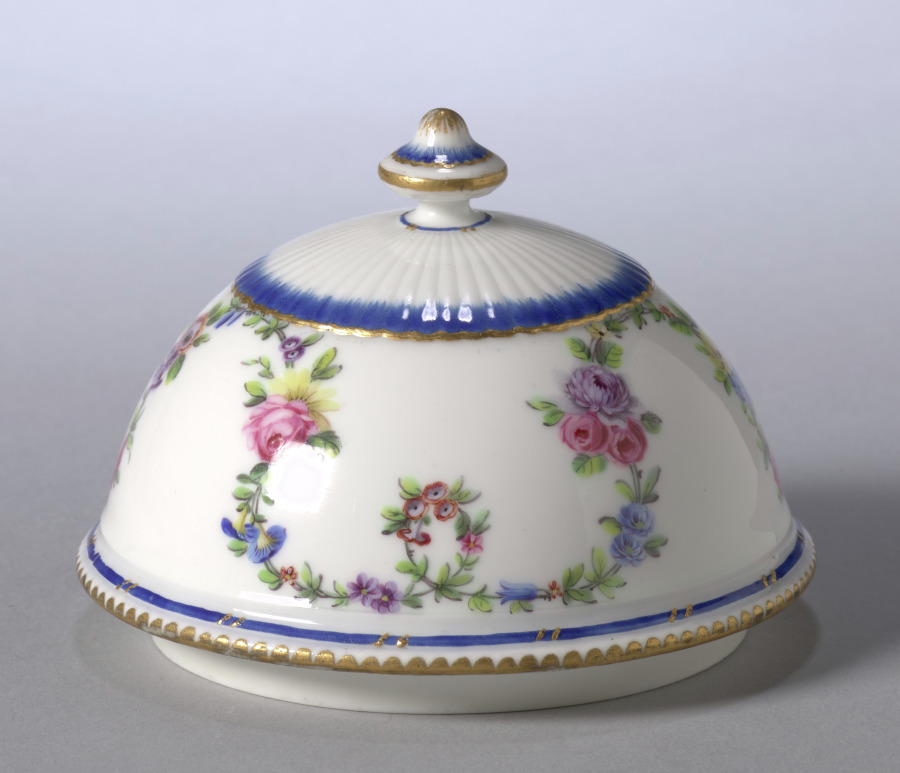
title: Soap Box (cover)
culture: France, Sèvres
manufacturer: Sèvres Porcelain Factory (French, est. 1756)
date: c. 1769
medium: soft-paste porcelain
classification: Ceramic